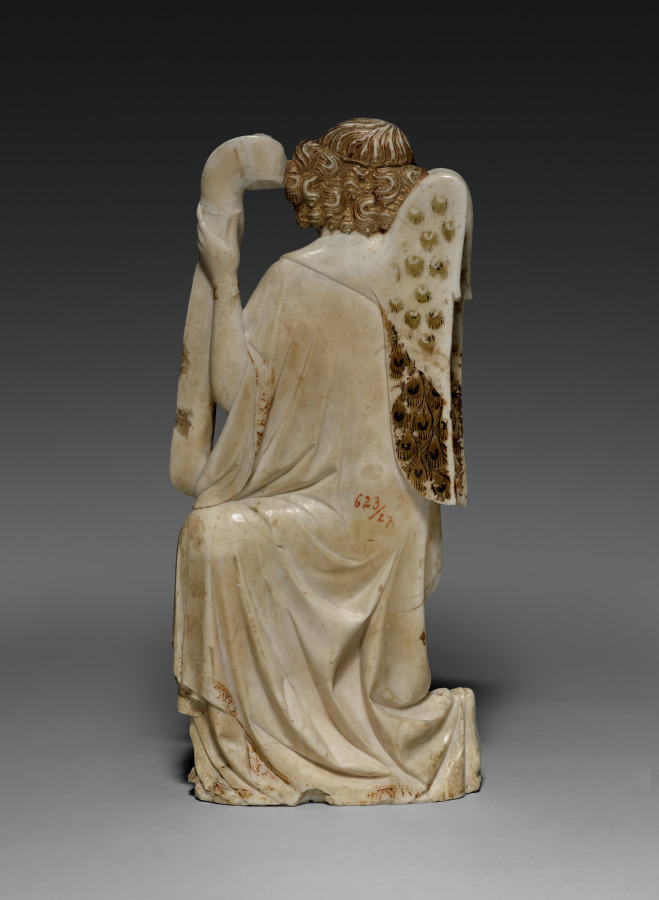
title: The Archangel Gabriel from an Annunciation Group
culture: France, Champagne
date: c. 1350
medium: alabaster with traces of paint and gilding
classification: Sculpture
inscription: Ave Maria, Gratia Plena.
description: In France, the use of alabaster began in the late 1200s for funerary monuments. The Archangel Gabriel, together with its counterpart, the Virgin Mary (now in the Louvre Museum, Paris) is part of an Annunciation. This is a rare example of alabaster sculpture from the 1300s. The alabaster comes from a quarry near Malaucène in Provence (France), making it an instance of long-distance trade of the rare material. Although the figure is very flat, it was likely made to also be viewed from the back, where there are remnants of gilding and the peacock feathers of the angel’s wing.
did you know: The surface of alabaster works can vary. By differentiating the intensity of polishing, it is possible for sculptures to create a surface with varying degrees of luster, or shine.